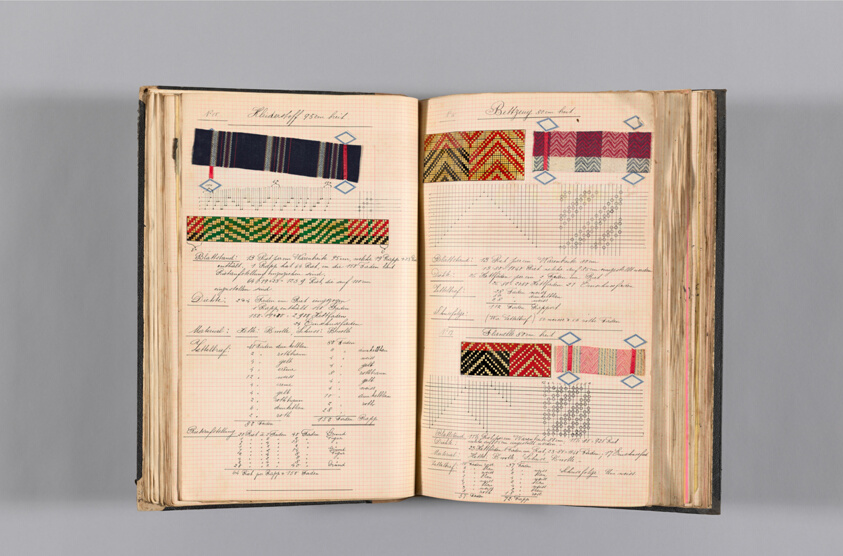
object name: Book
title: Student Notebook Containing Notes, Diagrams and Swatches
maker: Alfred Fehr (Switzerland, 1879-1955)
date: c. 1898–1900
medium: Bound notebook of technical notes and weave samples: fabrics for clothing and mixed goods, ribbed and twill cottons, and jacquard; 176 pages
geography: Germany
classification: book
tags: weaving, diagrams